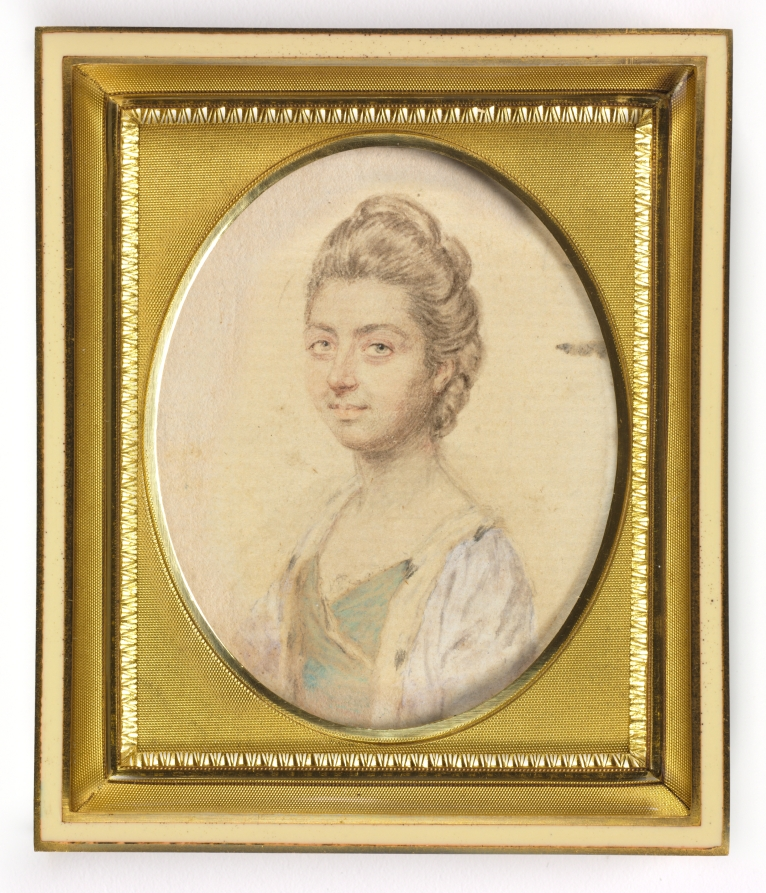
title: Portrait of Sukey, Lady Oglander, née Serle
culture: England, 18th century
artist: John I Smart (British, 1741–1811)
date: c. 1770s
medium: graphite and wash on laid paper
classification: Portrait Miniature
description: Although it is impossible to say if it was always part of the artist’s process to execute a preparatory sketch prior to painting each miniature, we do know that John Smart retained many hundreds of these sketches. A group of preparatory sketches—of which this portrait is one—descended through the Smirke family after Smart’s daughter Sarah gave a sketchbook containing preparatory portrait studies to her friend Mary Smirke, sister of the celebrated Victorian architect Sydney Smirke. This book was probably broken up around 1877 when it was divided between Sydney’s daughters Mary Jemmett and Mrs. Lange, whose portions were both sold at auction in 1928. G. C. Williamson was the first to suggest that Smart’s sketches were well known and that they were preparatory studies for the painted miniatures. Williamson listed the names of sitters from the sketches known to him at the time, and they include Lady Oglander. This portrait was assigned the historically colorful but fictitious title of “Duchess of Bourbon” at some point after memory of its true identity had been lost. Giving illustrious titles to portraits of unknown sitters was a popular strategy adopted by dealers during the nineteenth and twentieth centuries, often applied to miniature portraits and, in particular, to Smart’s sketches of women. However, when the paper backing was removed from this miniature, the name Lady Oglander was discovered written twice in graphite on the back. The lower inscription seems to have been reinforced or written later and is probably not in the artist’s hand. Compared to his contemporaries George Engleheart (1752–1829) and Andrew Plimer (1763–1837), whose female sitters were often painted in similar simple white gowns, Smart often lavished more attention on the costumes in his portraits of women, whose dresses incorporated colored silks, printed fabrics, and luxury trimmings like lace and fur, as seen here. The sitter’s head and shoulders face right, and her light hair is dressed high, with flat curls at the back of her head. She has gray eyes and wears a lavender surcoat trimmed with ermine, over a turquoise blue, low-necked dress and white underslip bordered with lace; the ermine trim confirms that the sitter was a titled lady. Smart placed her inside a faintly suggested oval, and the background is unpainted. Sukey, Lady Oglander (née Serle, d. 1805), married Sir William Oglander, 5th Baronet of Nunwell (1733–1806), in 1765. She was the only daughter of Peter Serle of Testwood, Hants, and delighted the Oglander family by bringing £10,000 to the marriage. Sukey had eleven children with William, eight of whom survived childhood. The Oglanders were a prominent and well-loved family on the Isle of Wight, their presence on the island first dating from the time of William the Conqueror and lasting until the title expired in 1874 when the last Oglander Baronet of Nunwell died. This preparatory sketch somewhat resembles a miniature on ivory of the same size that sold at Christie’s, London, in 2000. The sitter’s name is unknown, but she wears a nearly identical green wrap gown and underslip and a lavender surcoat, though it is trimmed with brown fur rather than ermine. Her coiffure is similar to that in the preparatory sketch as well, though in the ivory her hair is ornamented with pearls. The facial features, however, differ, with the sketch representing an older woman having somewhat coarser features. While the portrait may have been idealized in the finished ivory version, it is also possible that the sketch was employed primarily for the costume and depicts another sitter entirely. Daphne Foskett lists among Smart’s work portraits of a Dr. John Oglander and a Lady and Miss Oglander. A preparatory sketch by Smart of a Mr. Oglander sold at Christie’s, London, on June 10, 2010. Another preparatory sketch titled Portrait of John Oglander, Warden of New College, Oxford, was sold at Bonhams, London, on October 30, 2001. These sketches are approximately the same size as Cleveland’s Lady Oglander and may have been commissions related by date or patron. The sale of Smart drawings inherited by W. H. Bose and sold at Christie’s, London, in 1937 included a “Head of Miss Oglander,” “sister to Sir John Oglander of the Isle of Wight,” but this lot was not illustrated, and its relationship to the sketch discussed here is unknown. John Oglander, Warden of New College, Oxford, was the brother-in-law of Sukey, Lady Oglander, and Miss Oglander was probably her sister-in-law Susannah Oglander (d. 1816).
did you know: Sketches helped John Smart work out the particulars of a portrait before commencing the miniature on ivory, and they were useful in the event that a duplicate might later be required.